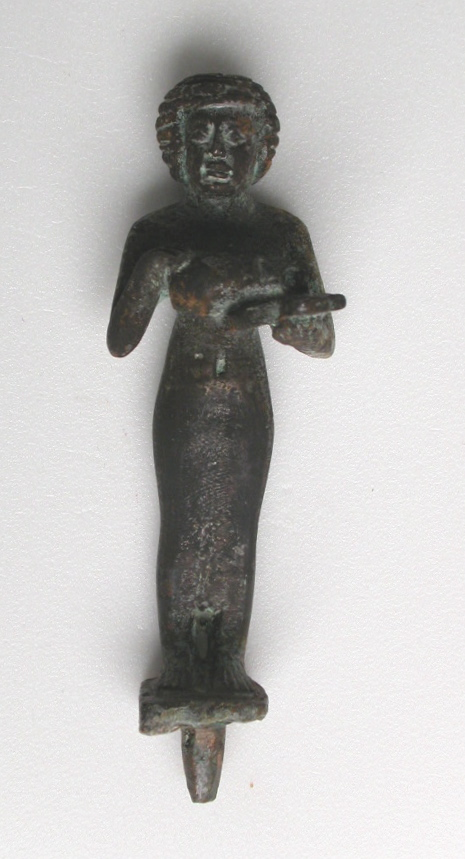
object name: Sculpture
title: Statuette of a Priestess with Offering Table and Situla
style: egyptian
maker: Egyptian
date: Third Intermediate Period, Dynasties 22–25 (about 945–656 BCE)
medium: Bronze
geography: Egypt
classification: statuette; bronze; metal; sculpture; ancient art